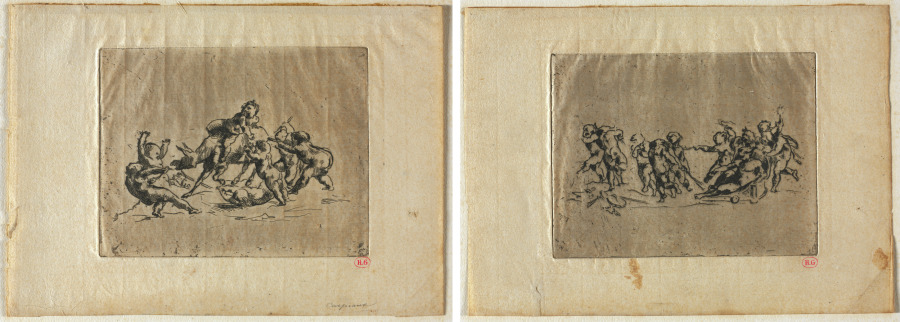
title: Bacchanal with Children and Donkey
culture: France, 19th century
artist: Jean-Baptiste Carpeaux (French, 1827–1875)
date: c. 1860–70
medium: etching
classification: Print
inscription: below the lower right platemark edge: stamp for Hector Giacomelli (Lugt 1311)